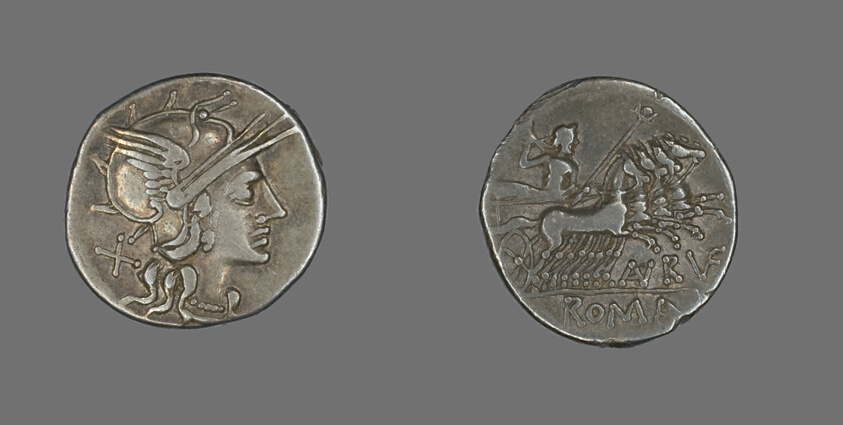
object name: Coin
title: Denarius (Coin) Depicting the Goddess Roma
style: roman (ancient, style or period), ancient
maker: Roman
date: 144 BCE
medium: Silver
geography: Roman Empire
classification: coin; ancient art